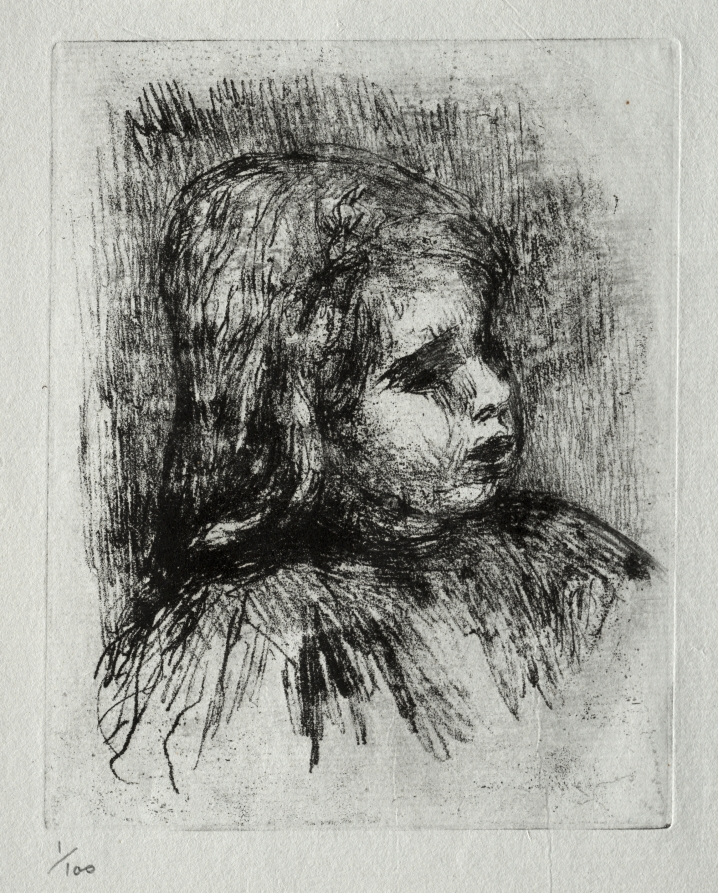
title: Claude Renoir, de trois-quarts à droite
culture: France, late 19th-early 20th Century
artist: Pierre-Auguste Renoir (French, 1841–1919)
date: 1908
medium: softground etching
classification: Print